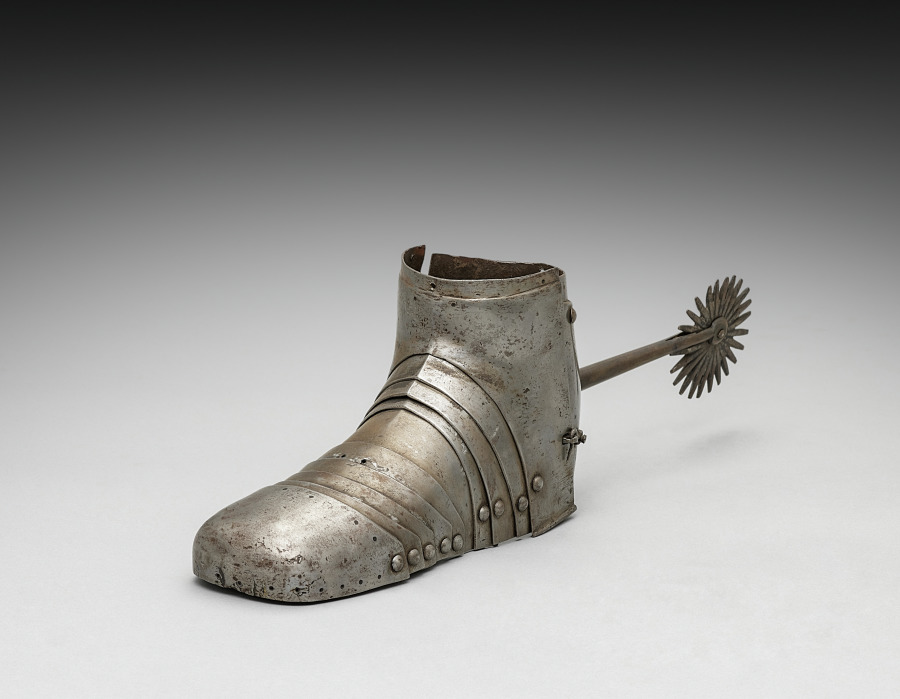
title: Right Sabatoun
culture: Germany, 19th century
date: 1801–1900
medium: steel with black paint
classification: Arms and Armor